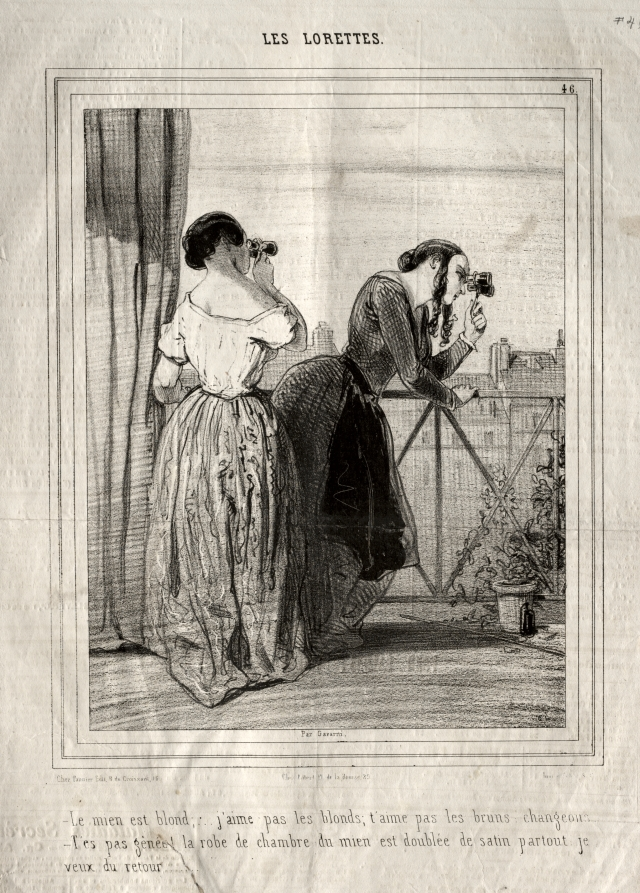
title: Les Lorettes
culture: France, 19th century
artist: Paul Gavarni (French, 1804–1866)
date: 1842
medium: lithograph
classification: Print